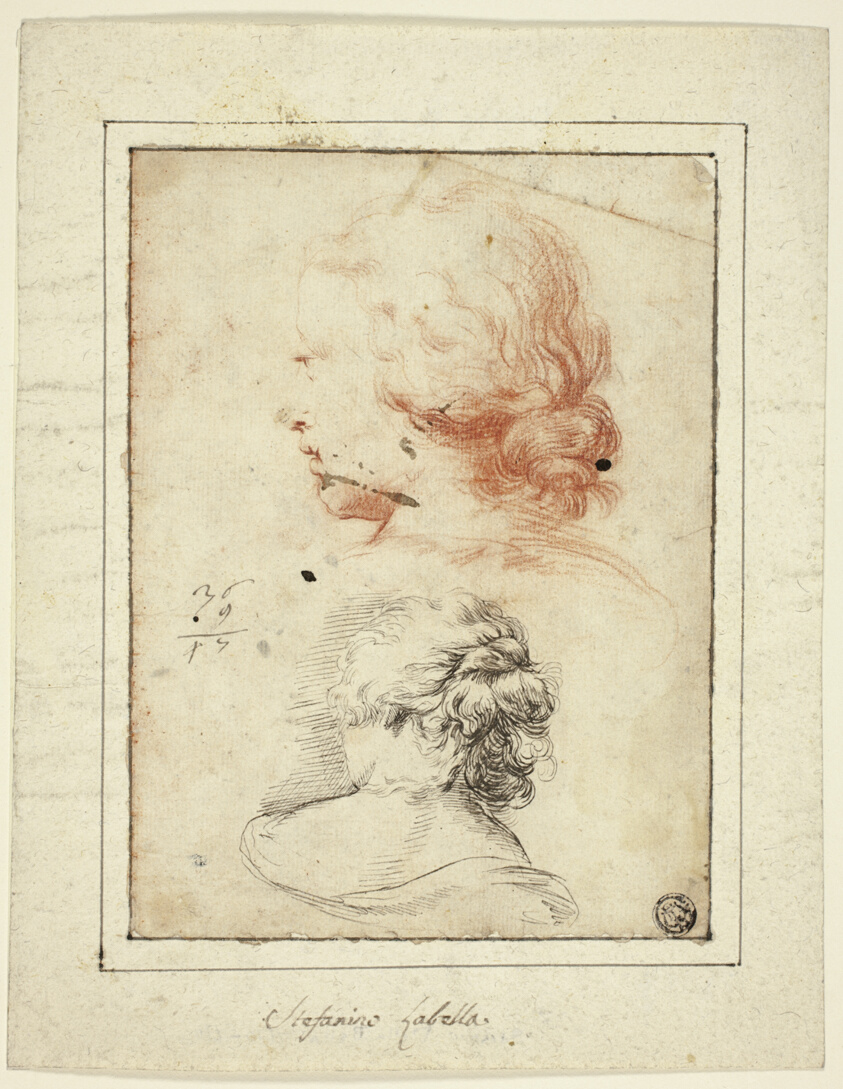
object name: Drawing and Watercolor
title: Two Studies: Female Head in Three-Quarter Profile; Female Bust Seen from the Back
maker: After Stefano della Bella; Italian, 1610-1664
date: c. 1647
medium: Red chalk and pen and black ink on buff laid paper, laid down on ivory wove paper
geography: Italy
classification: chalk; drawings (visual works); prints and drawing